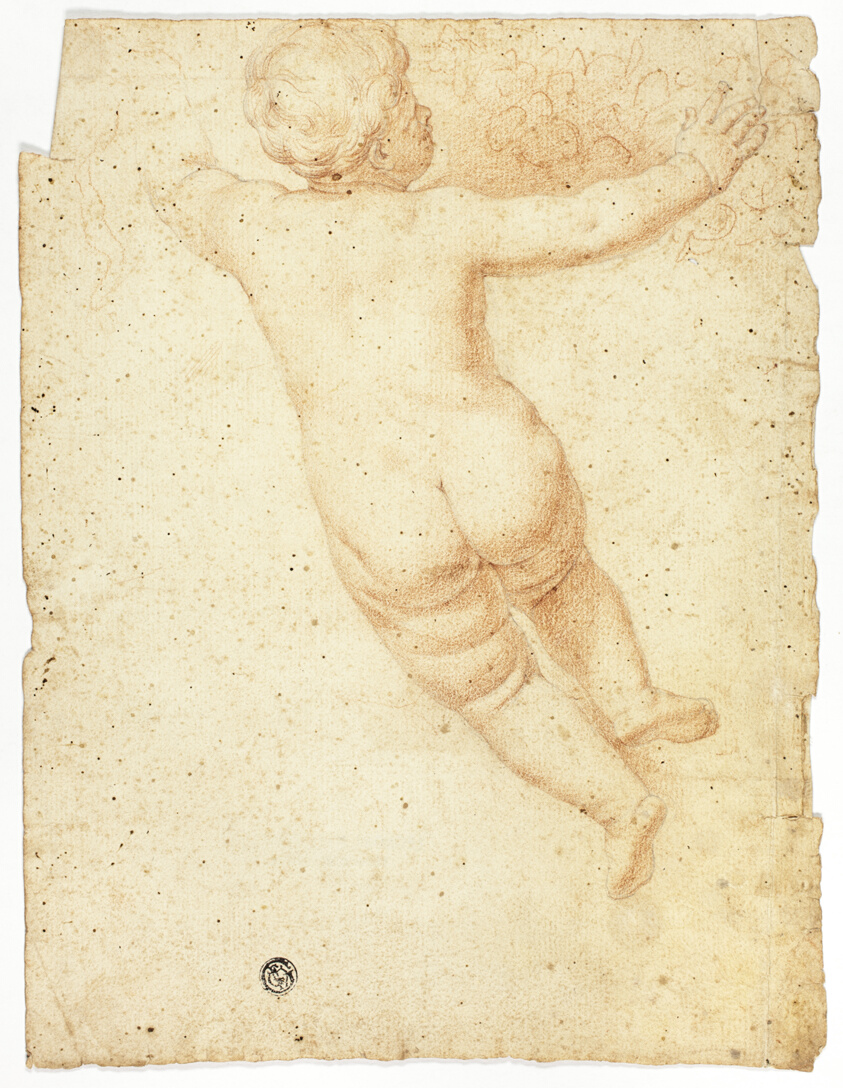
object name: Drawing and Watercolor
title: Putto from Back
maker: John Downman (English, 1750-1824)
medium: Red chalk, with graphite, on buff laid paper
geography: England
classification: chalk; drawings (visual works); prints and drawing